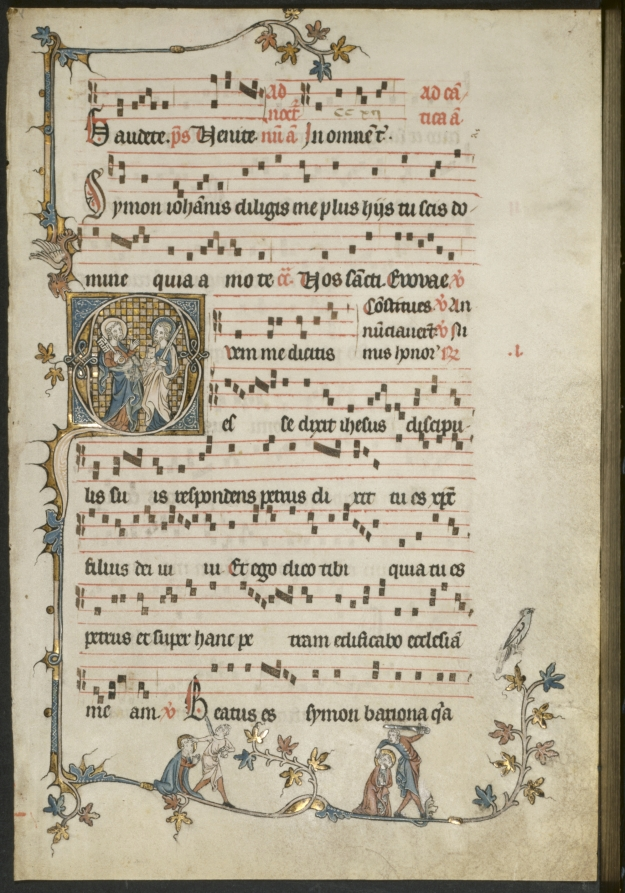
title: Leaf Excised from an Antiphonary: Initial Q with Saints Peter and Paul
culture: South Flanders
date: c. 1325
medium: ink, tempera and gold on vellum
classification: Manuscript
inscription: Quem me [esse] dicitis dixit Ihesus discipulis suis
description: The sheet belonged to an antiphonary, a large liturgical book used by the choir for chanting. It contains all the music and texts needed for daily services in the church. In South Flanders, where this manuscript originates, the Confrérie des Charitables de Saint-Éloi has been active since 1188, when a plague wave raged in the region. This brotherhood was in charge of giving bread to the poor, caring for the sick, consoling the dying, burying the dead, and giving them a burial.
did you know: This leaf comes from a manuscript once owned by the famous Victorian art critic John Ruskin (1819–1900), who removed some of its leaves to give away as gifts.